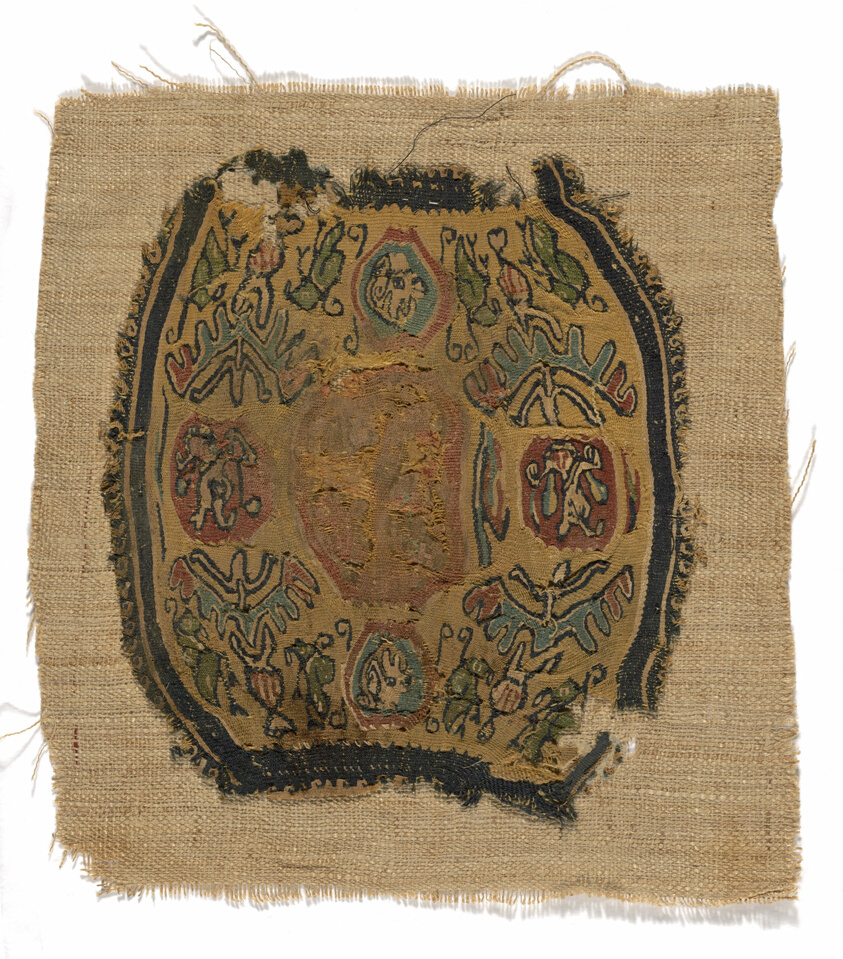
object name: Textile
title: Roundel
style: roman period (egyptian)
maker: Coptic (Egypt)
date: Roman period (30 B.C.– 641 A.D.)/Arab period (641–969), 6th/8th century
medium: Linen and wool, tapestry weave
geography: Egypt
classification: textile; weaving